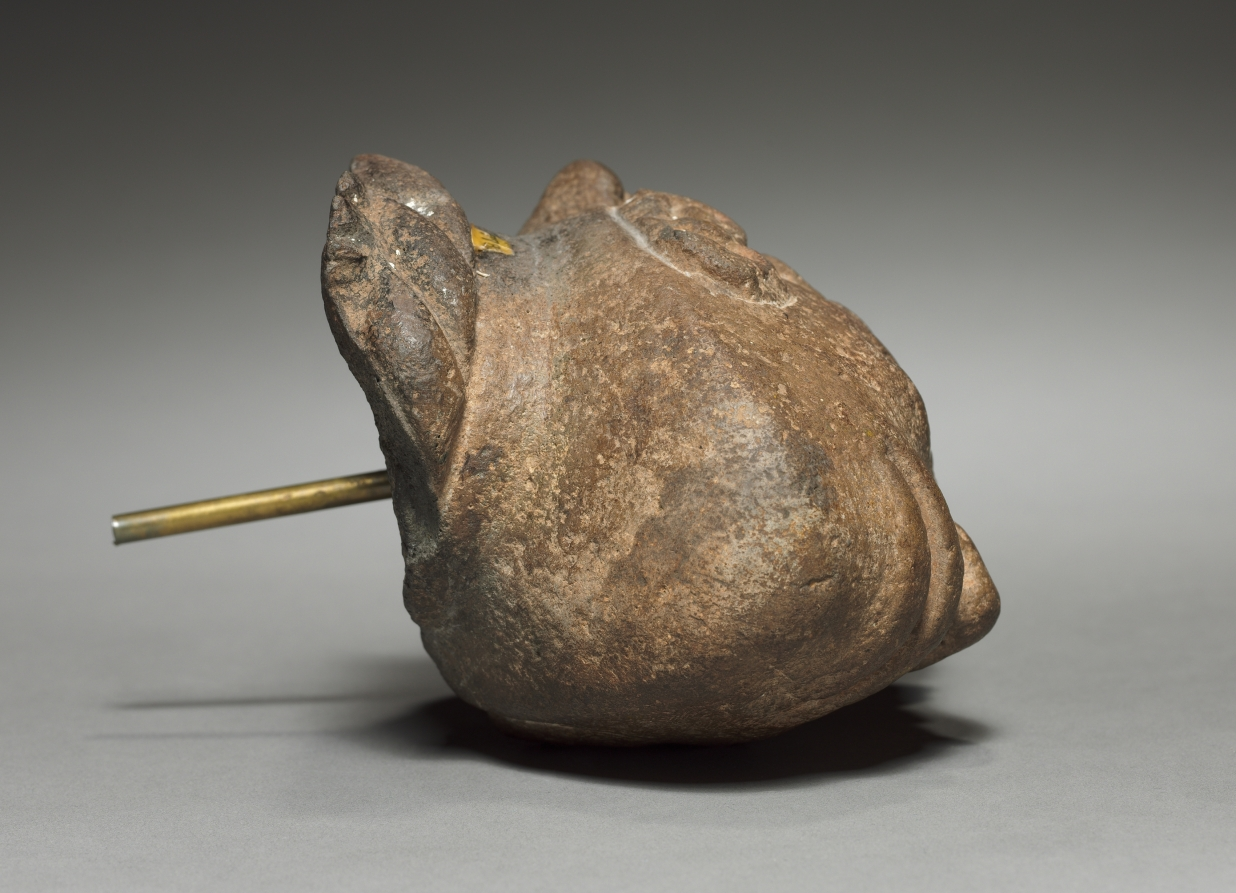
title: Head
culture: Mexico, Classic Veracruz (Totonac or Tajin)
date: 600–1100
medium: stone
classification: Sculpture